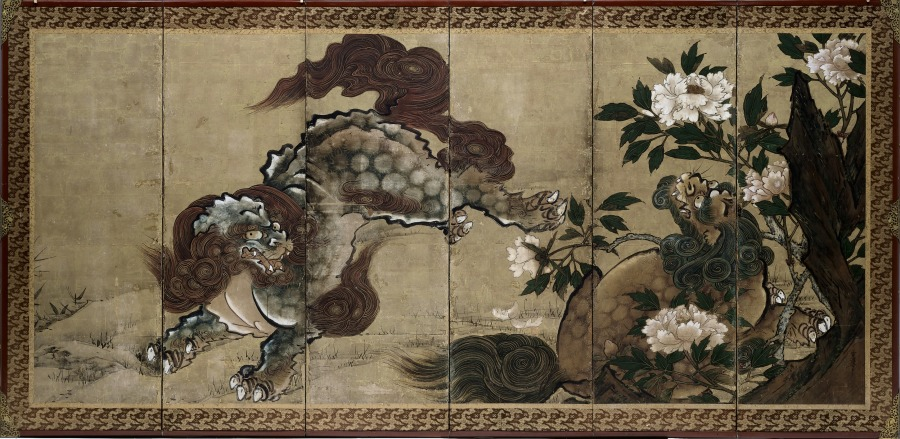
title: Lions and Tigers in Peony and Bamboo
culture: Japan, Edo period (1615–1868)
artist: Yamaguchi Sekkei (Japanese, 1644–1732)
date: 1668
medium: pair of six-panel folding screens; ink and color on gilded paper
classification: Painting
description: Sekkei lived and studied painting in Kyoto at the Kano school studio, the center of traditional painting activity in Japan since 1500. The use of gold foil as a backdrop for the frolicking animals served a practical as well as a decorative function. Because traditional Japanese rooms had no windows, interior lighting came from portable oil lamps and wax candles, whose effects were magnified by reflective surfaces.